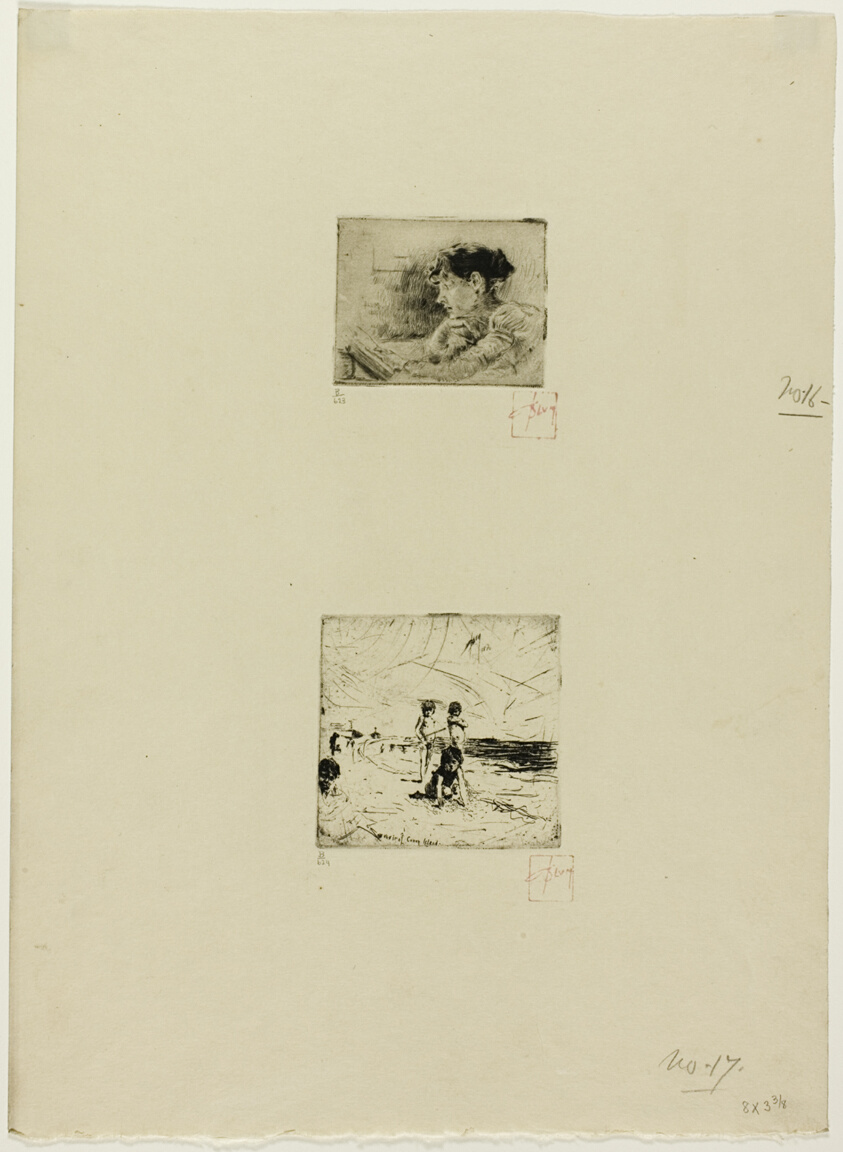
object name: Print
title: Girl Reading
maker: Robert Frederick Blum (American, 1857-1903)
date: 1883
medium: Etching on cream wove paper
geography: United States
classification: etching; print; prints and drawing